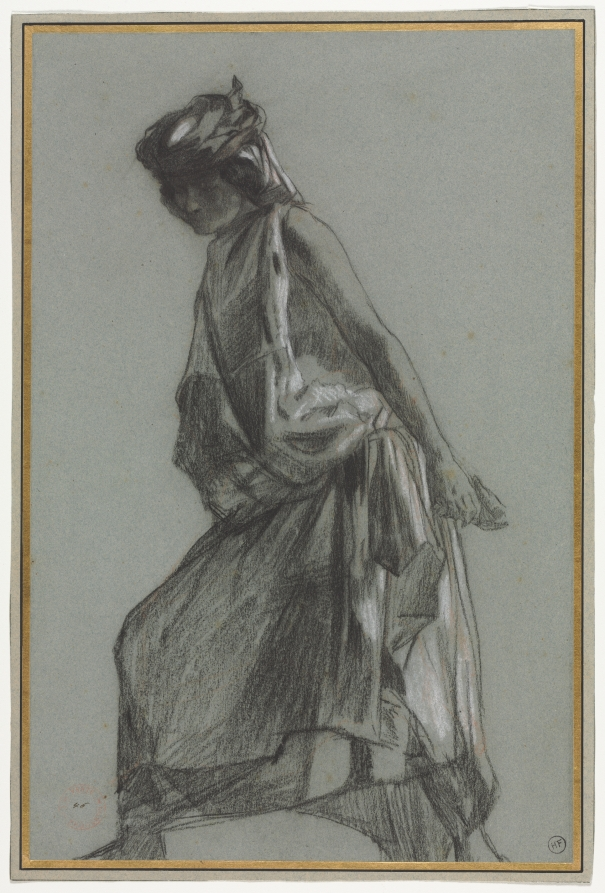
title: Arab Woman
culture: France, 19th century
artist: Eugène Fromentin (French, 1820–1876)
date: c. 1852–53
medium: black chalk, with red chalk, heightened with white chalk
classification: Drawing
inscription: Verso of secondary support, lower left, in graphite: # [4?]6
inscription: lower left, in graphite: FROMENTIN. Eugene / 1820-1876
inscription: lower center, in graphite: 2)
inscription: lower right, in graphite: [dunkle?] / white